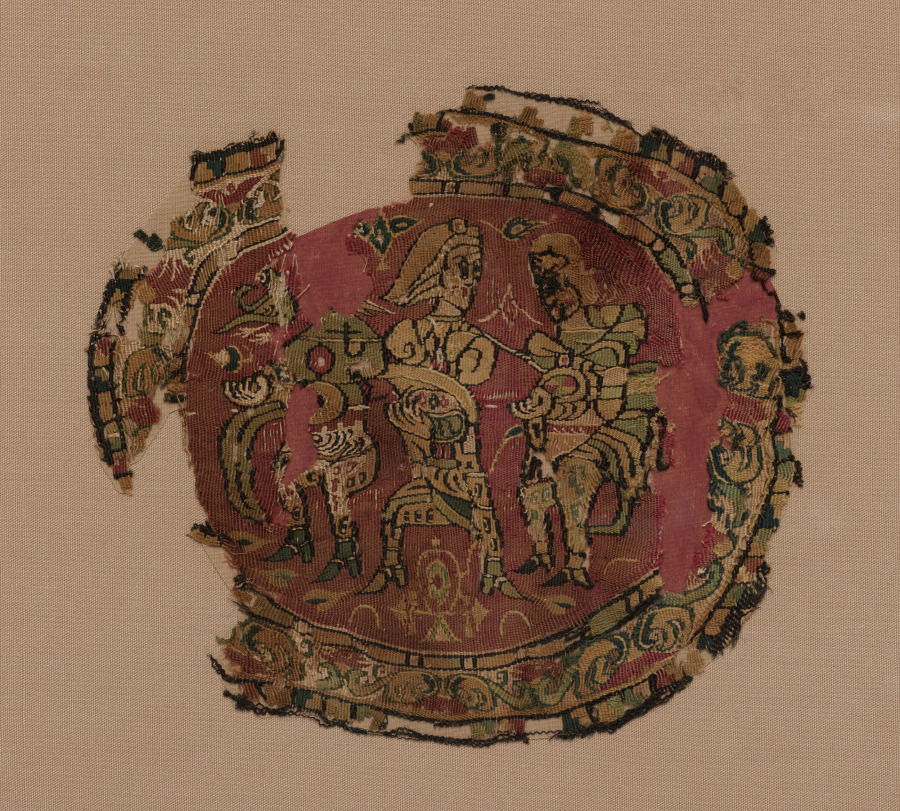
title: Three Figures from a Tunic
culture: Egypt, Abbasid period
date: 750–800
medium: tapestry weave; undyed linen and dyed wool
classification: Textile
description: Three figures are clothed in large shawls, spotted trousers, and riding boots. They awkwardly carry gifts in bowls or on trays, since their large hands and arms do not seem connected to their bodies.